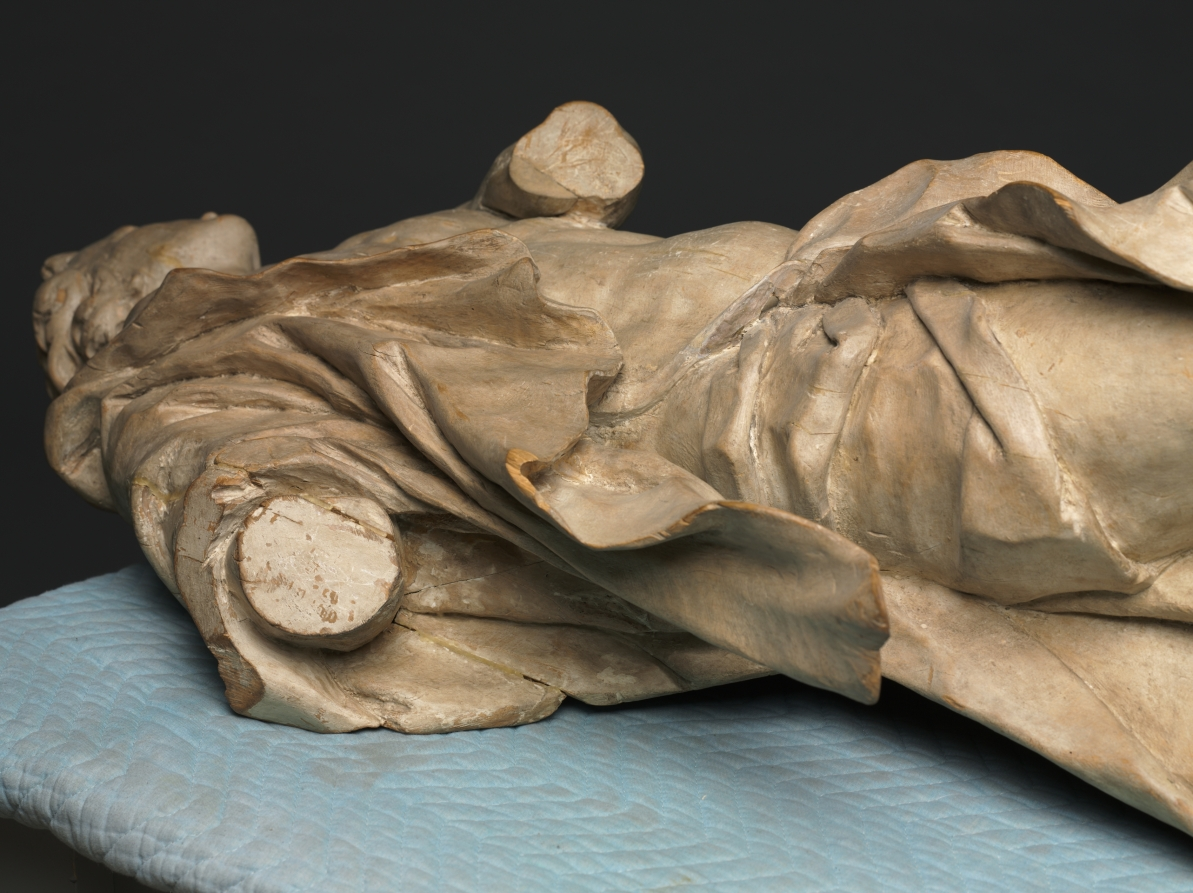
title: A Saint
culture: Germany or Austria, 18th century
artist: follower of Diego Francesco Carlone (Italian, 1674–1750)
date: c. 1730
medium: wood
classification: Sculpture